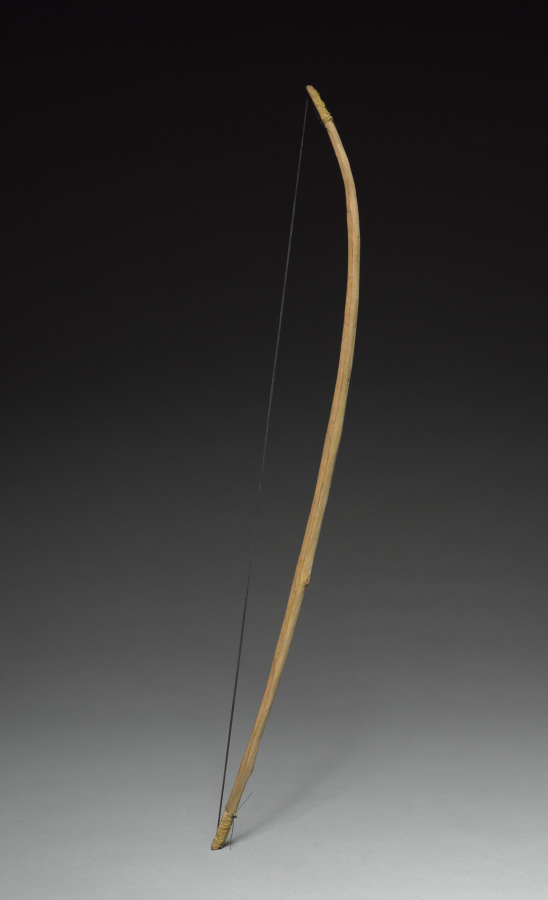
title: Bow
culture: America, North American Indian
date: 20th century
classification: Musical Instrument